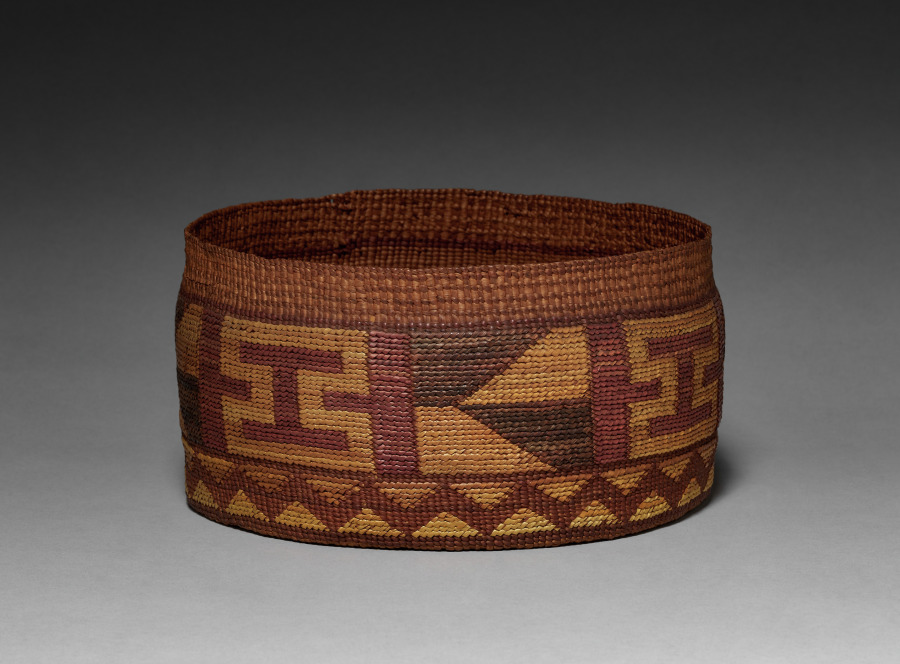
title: Basket with Raffle Top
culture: Northwest Coast, Tlingit, 20th century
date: before 1929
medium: twined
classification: Basketry